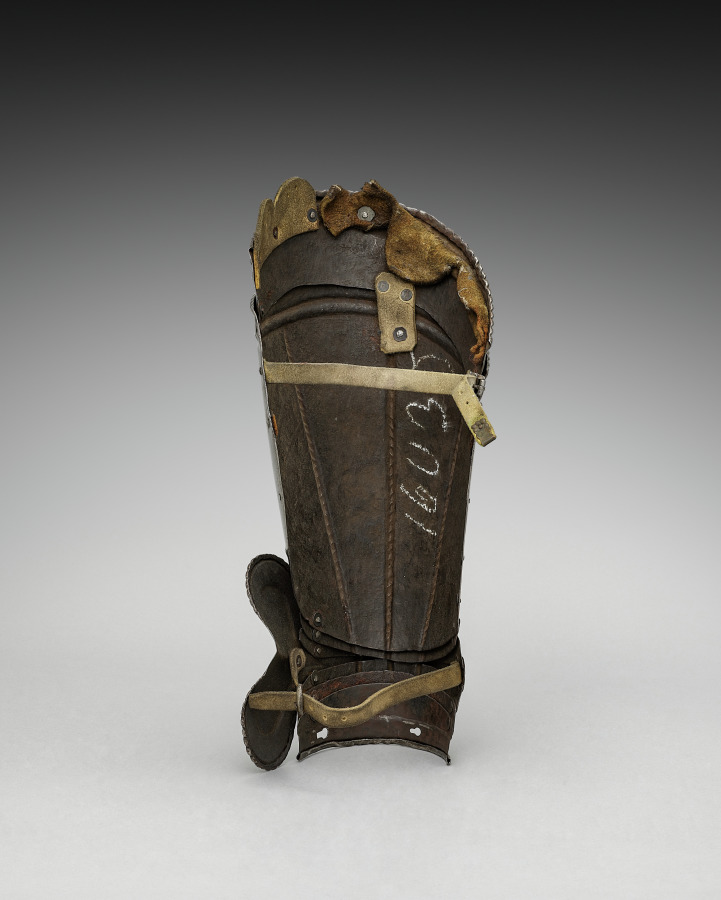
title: Left Cuisse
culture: Germany, 19th century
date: 1801–1900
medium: steel with black paint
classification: Arms and Armor